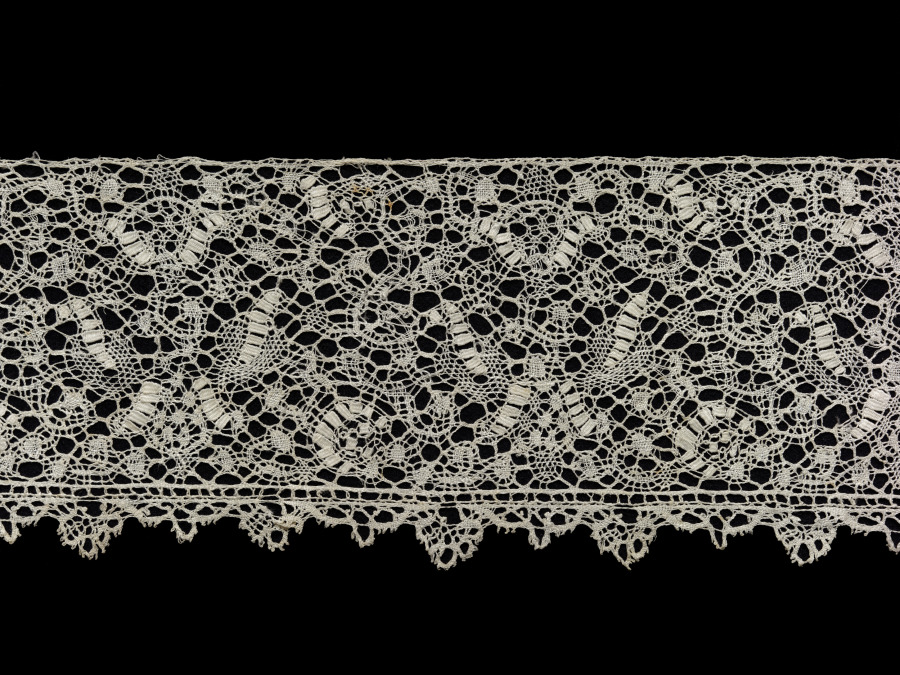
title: Lace Insertion and Edging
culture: Belgium, Binche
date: 1700s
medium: Bobbin lace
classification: Lace